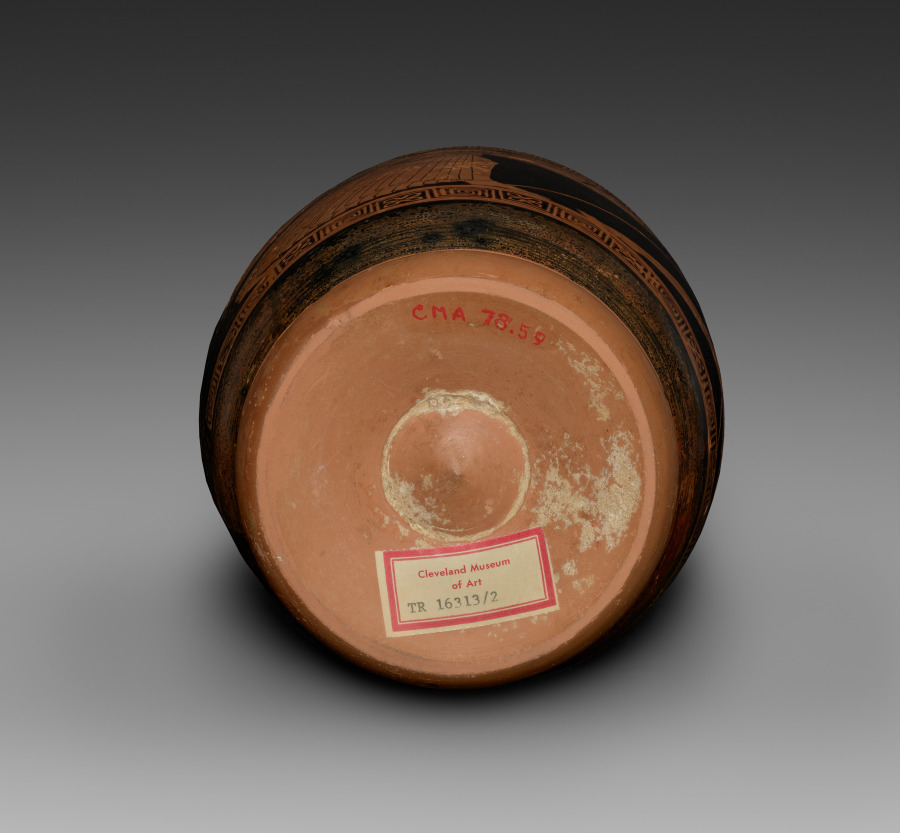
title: Red-Figure Lekythos (Oil Vessel): Athena Slaying Giant (body); Satyr between Maenads (shoulder)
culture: Greek, Attic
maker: attributed to Berlin Painter (Greek, Attic, active c. 505–460 BC)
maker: attributed to Painter of Goluchow 37 (Greek, Attic, active c. 490–460 BC)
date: c. 490 BCE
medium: ceramic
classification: Ceramic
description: The two separate areas of figural decoration on this vase have been attributed to different painters: the small satyr and maenads on the shoulder to the Berlin Painter; and the larger figures of Athena and the slain Giant Enkelados on the body to the Painter of Goluchow 37. Scholars have named these two painters, whose actual names remain unknown, after other vases they have painted, now in Berlin and Warsaw. The victory of Athena and the Olympian gods over the Giants has been interpreted as a metaphor for the Greek victory over the Persians around the time this vase was made. Thus, although Enkelados appears as a fully armed warrior, he falls in utter and complete defeat—bleeding from multiple wounds, eyes rolling back, sword dropping from his hand.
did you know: First attributed to Douris, this vase is now thought to have been painted by two anonymous painters.